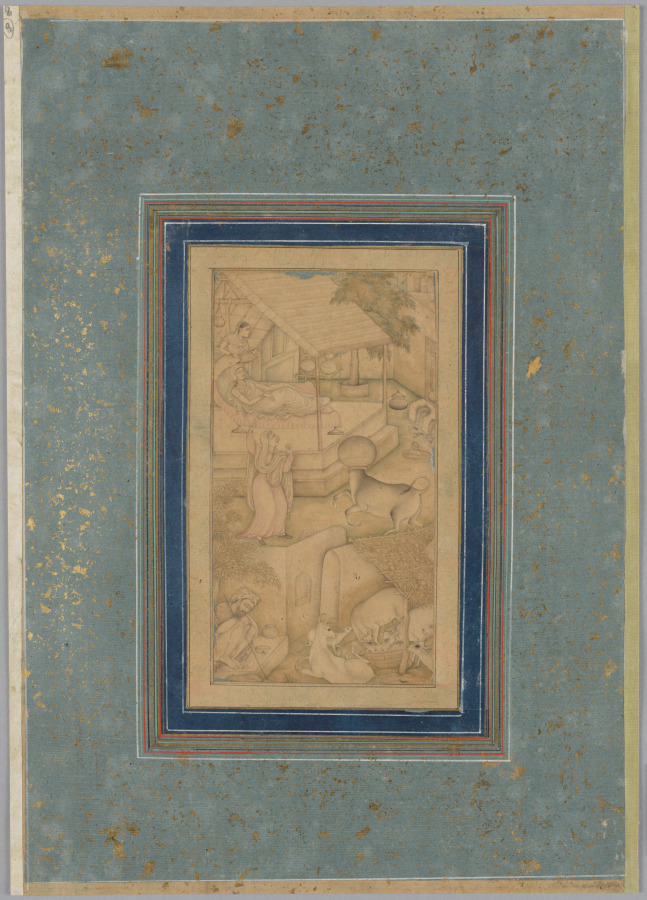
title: A woman mistakes a cow for the Angel of Death, from a Lights of Canopus (Anwar-i Suhaili) of Kashifi (Iranian, d. 1504)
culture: Mughal India, court of Jahangir (1605–1627)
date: c. 1610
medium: Gum tempera on paper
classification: Drawing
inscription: walida-i-rustam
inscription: Zal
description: In this gently colored, amply shaded painting, an ailing girl lies listless, eyes barely open, as an attendant fans her. A cow who got her head stuck in a pot has entered the yard in confusion. The girl’s mother, who had been weeping and praying to exchange her own life for the health of her daughter, thought the Angel of Death had come to take her. Pointing to heaven, the woman begs that her daughter be taken instead. Outside the gate, a wandering holy man dozes, indicating this scene takes place in the evening, and a calf annoys her mother as she eats.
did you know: A previous owner identified the scene as the first cesarean section.